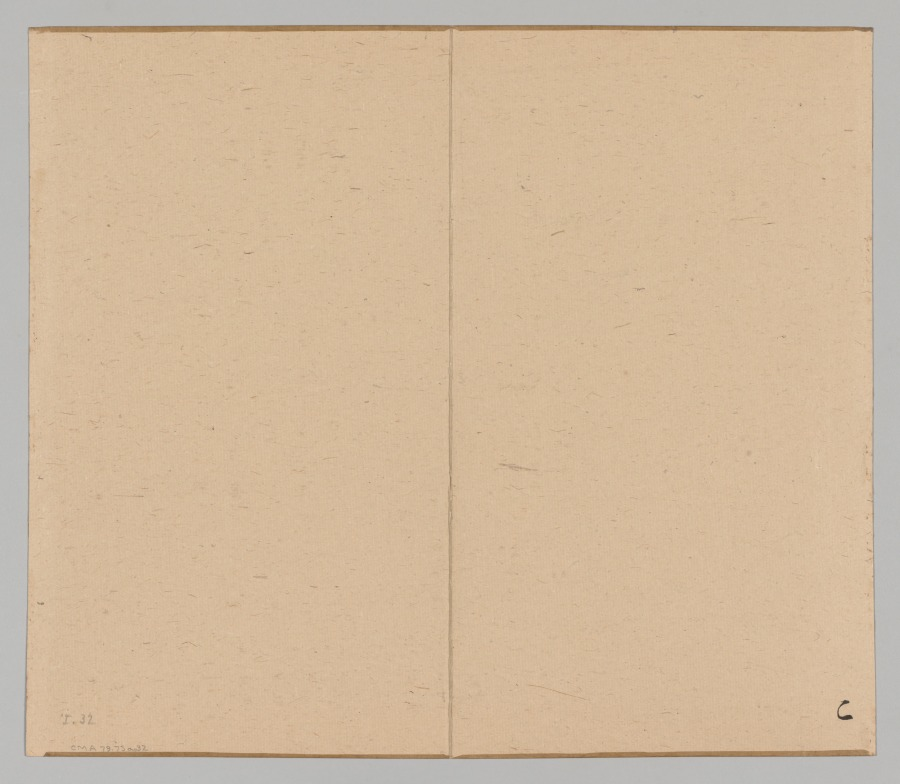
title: Reverberations of Taiga, Volume 1 (leaf 32)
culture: Japan, Edo period (1615–1868)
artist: Aoki Shukuya (Japanese, d. 1802)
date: mid- to late 1700s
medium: double-leaf from a pair of albums; ink and light color on paper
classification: Portfolio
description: Traditionally, young painters in Japan began their studies with an established master-painter. The master's compositions invariably became models that the apprentice copied to learn various ink and brush techniques. Shukuya was a pupil of the famous Kyoto artist Ikeno Taiga, whose style is reflected in these sketches of rocks, trees, and mountains.